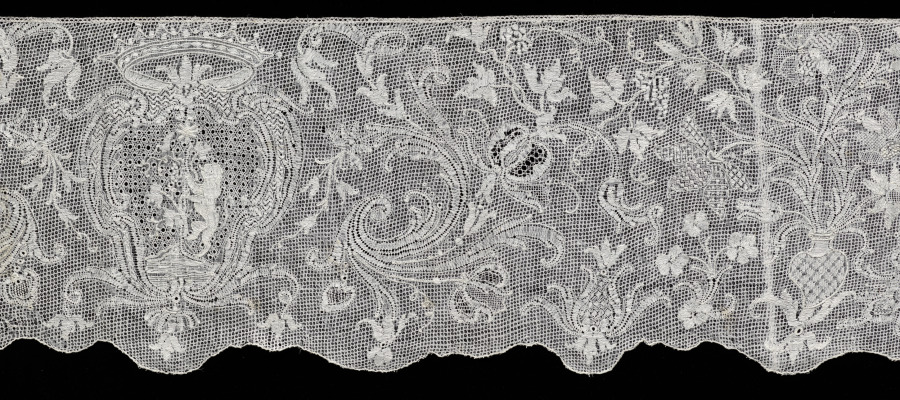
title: Lace Flounce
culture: Belgium, Dinant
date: 1700s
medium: Linen: needle lace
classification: Lace